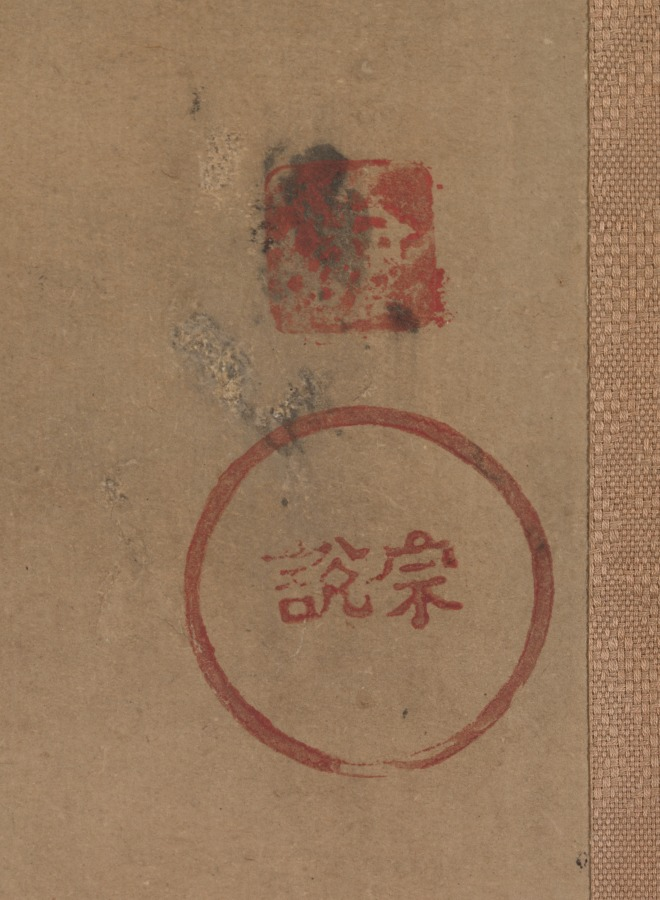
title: Summer Flowers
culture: Japan, Edo period (1615–1868)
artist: Kitagawa Sōsetsu (Japanese, active 1639–50)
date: mid-1600s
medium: hanging scroll; ink, color, and gold on paper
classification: Painting